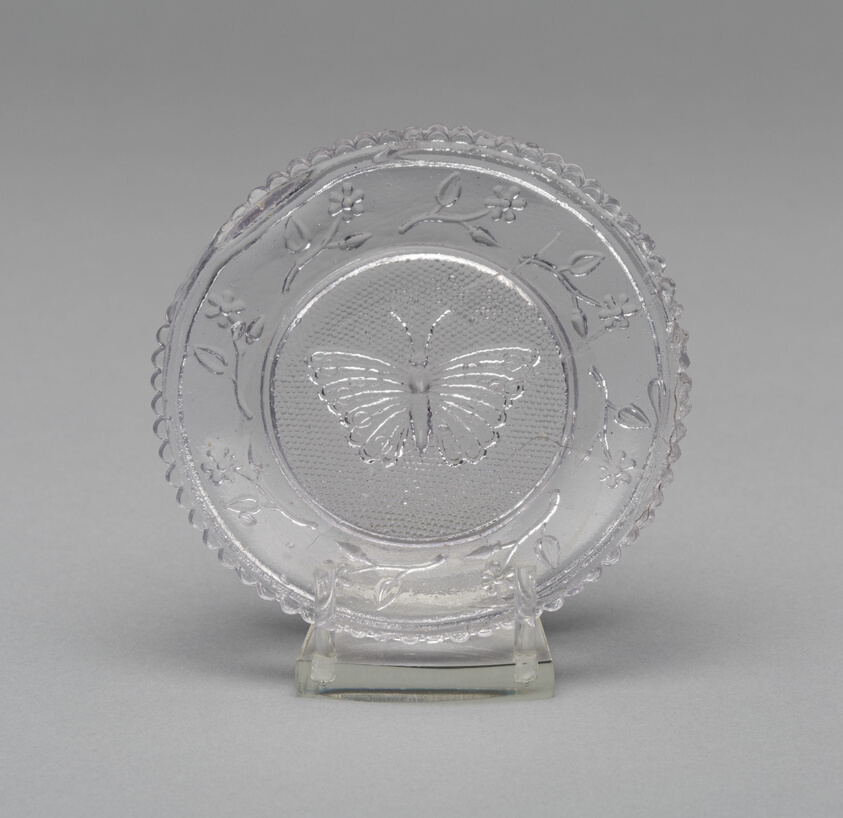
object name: Glass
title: Cup plate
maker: Artist unknown (American, 19th century); Sandwich, Massachusetts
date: 1840–45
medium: Pressed glass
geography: Sandwich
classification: plate (general, dish); glass; american decorative arts; american arts; decorative arts